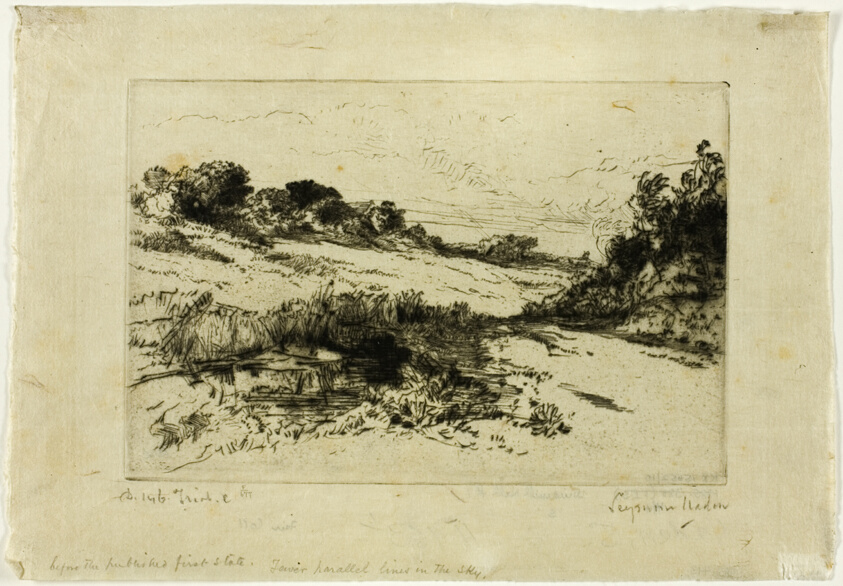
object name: Print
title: Windmill Hill, No. I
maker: Francis Seymour Haden (English, 1818-1910)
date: 1877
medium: Drypoint on copper printed on ivory laid paper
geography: England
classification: etching; print; prints and drawing